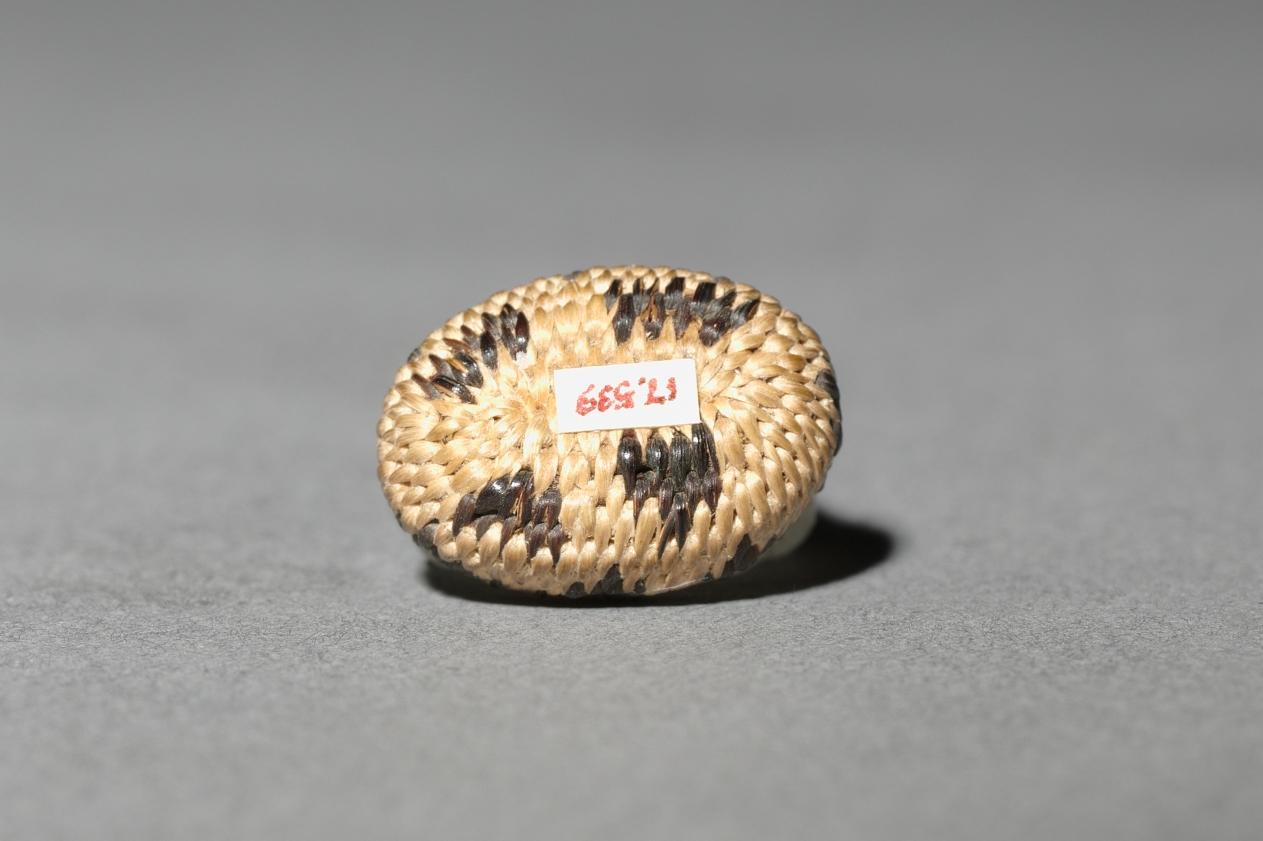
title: Miniature Oval Basket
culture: California, Pomo, 20th century (?)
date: Early 1900s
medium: coiled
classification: Basketry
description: Miniature baskets were made to demonstrate the basket-maker’s virtuoso skill, and these tiny marvels seem to be no exception—the smallest are just a few millimeters wide but still patterned. For such fine work, dexterity was required as much for preparation of materials as for weaving.